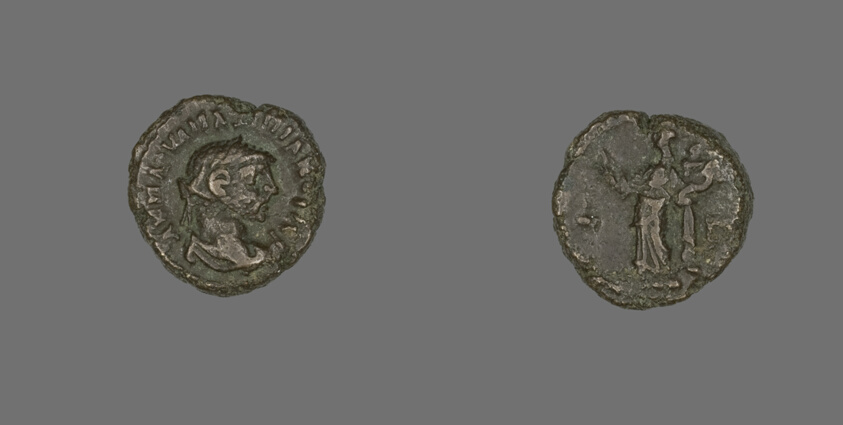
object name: Coin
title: Coin Portraying Emperor Maximianus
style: greco-roman (egyptian)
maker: Roman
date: 288-289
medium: Billon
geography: Alexandria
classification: coin; ancient art